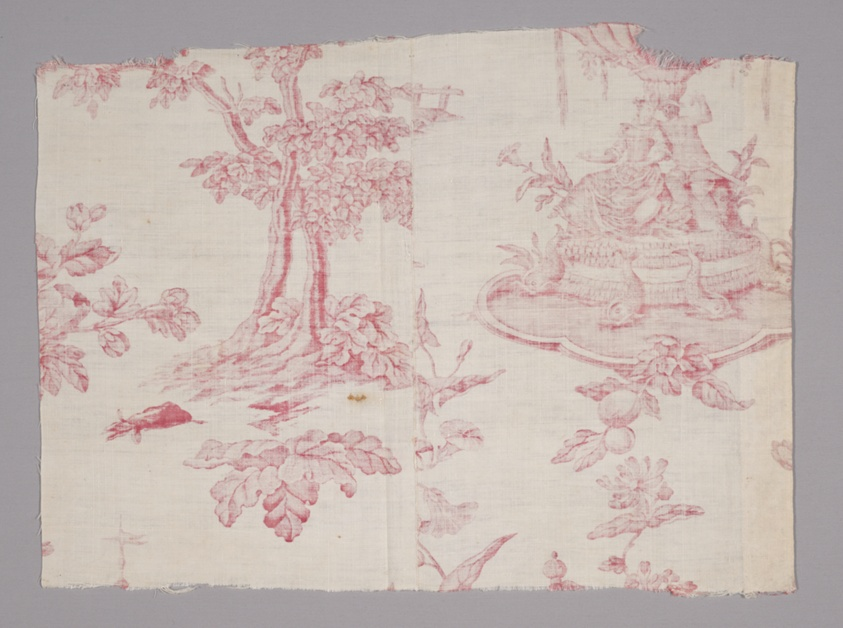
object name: Coverings and Hangings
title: Curtain Fragment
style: 18th Century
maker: England and possibly India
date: late 18th century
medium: Cotton; copperplate printed; block printed trimming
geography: England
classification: weaving - printed; textile; printed textile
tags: Chinoiserie, fountains, flowers, floral motifs, trees